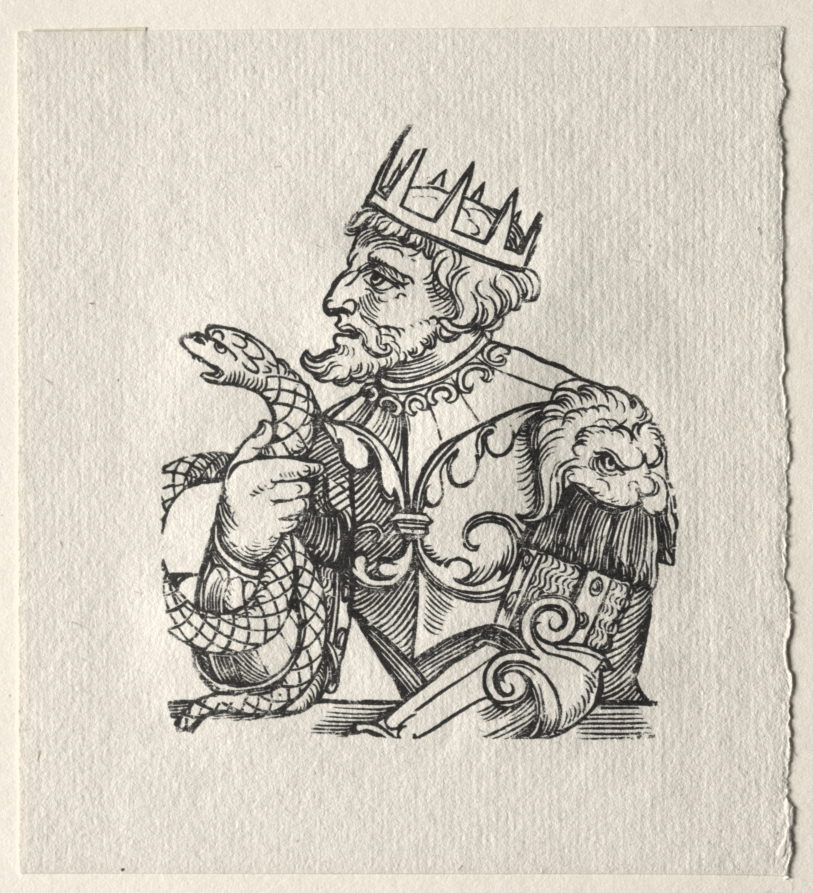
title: Tyrants of the Old Testament: Antiochus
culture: Germany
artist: Georg Pencz (German, c. 1500–1550)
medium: woodcut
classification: Print